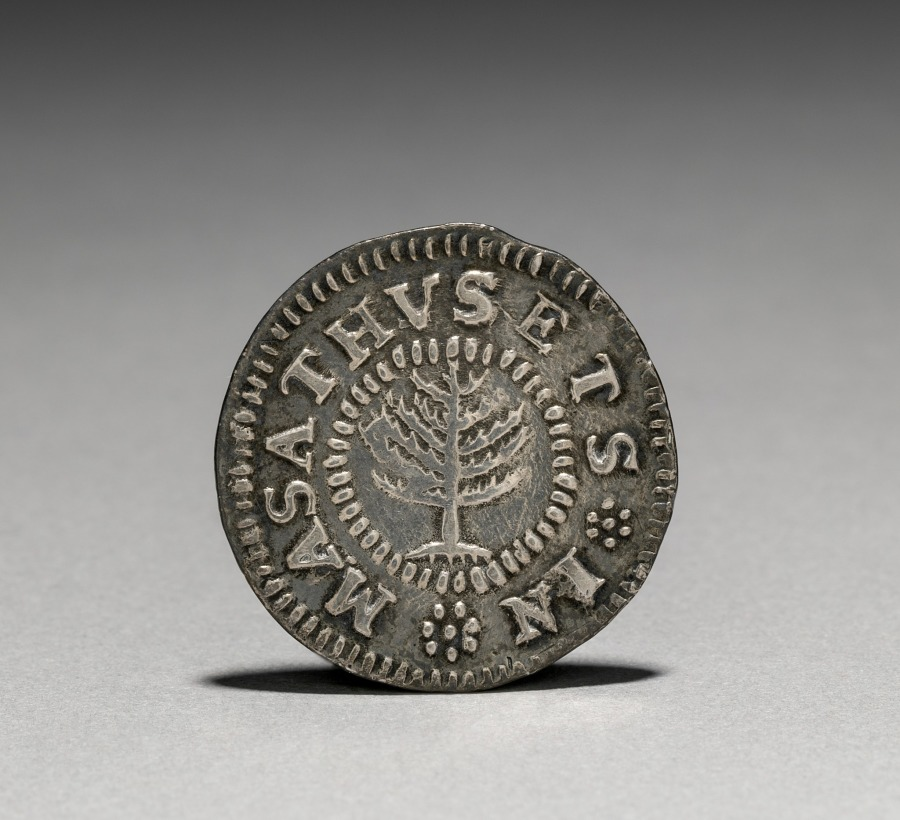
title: Shilling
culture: America, Massachusetts, Boston, 17th century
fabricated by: John Hull (American, 1624–1683)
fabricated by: Robert Sanderson (American, 1609–1693)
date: 1652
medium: silver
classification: Coins